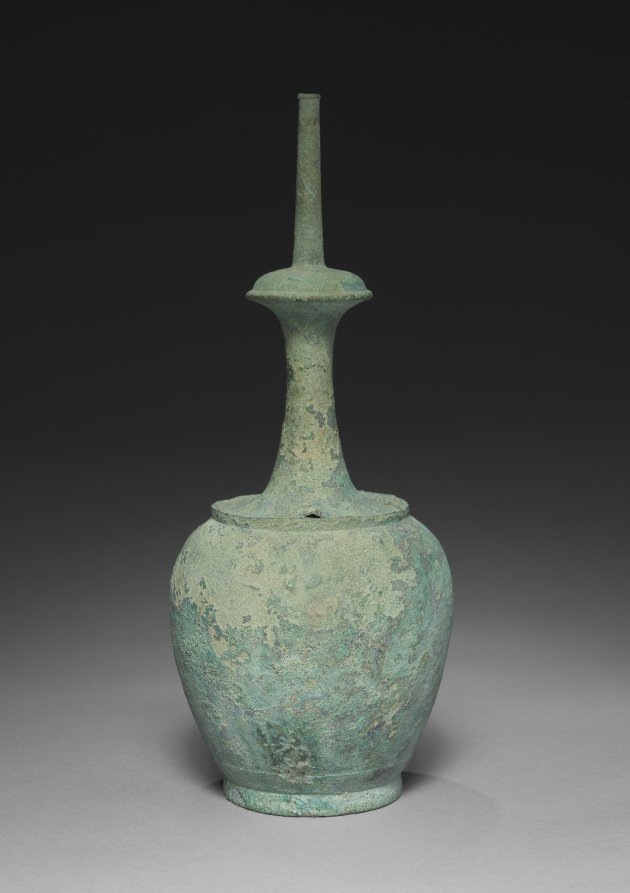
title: Water Ewer for Rituals (Kundika)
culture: Korea, Goryeo dynasty (918–1392)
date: 1100s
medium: bronze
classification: Metalwork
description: Known as kundika in Sanskrit, this distinctively shaped vessel served to purify a sacred space and to invoke a deity. In Korean Buddhist art, it appears primarily as an attribute of the Bodhisattva Avalokitesvara (Gwaneum in Korean). By the 12th century, however, it came to serve as aristocrats’ fancy water container for everyday use.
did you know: This distinctively shaped vessel is called a kundika in Sanskrit, simply referring to a water bottle.